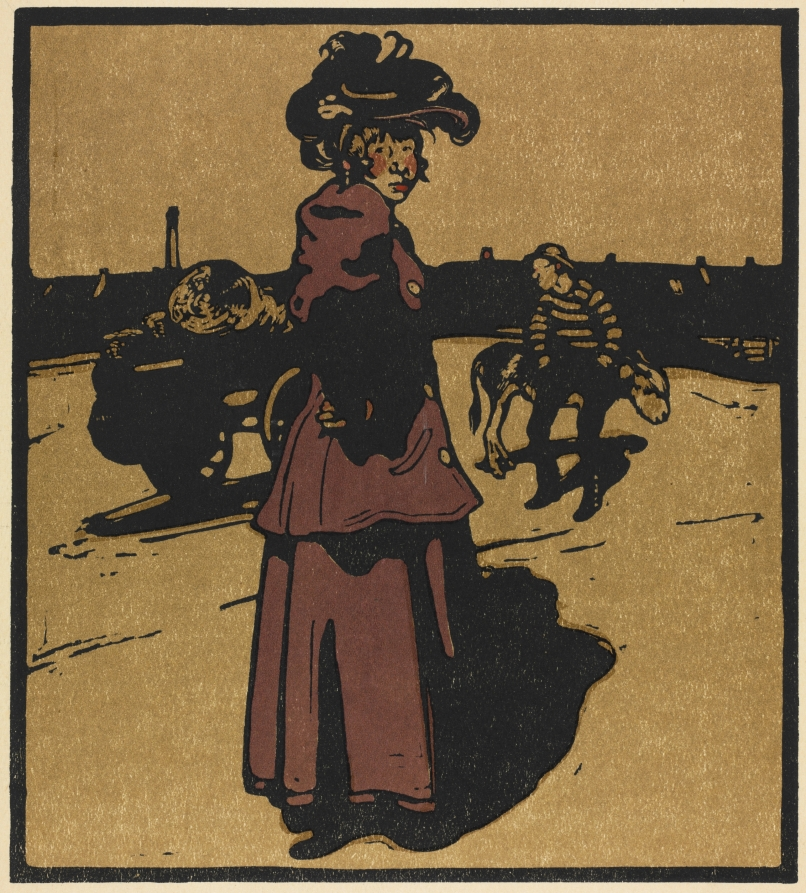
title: London Types: Costermonger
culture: England, 19th century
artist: William Nicholson (British, 1872–1949)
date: 1898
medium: color lithograph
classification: Print